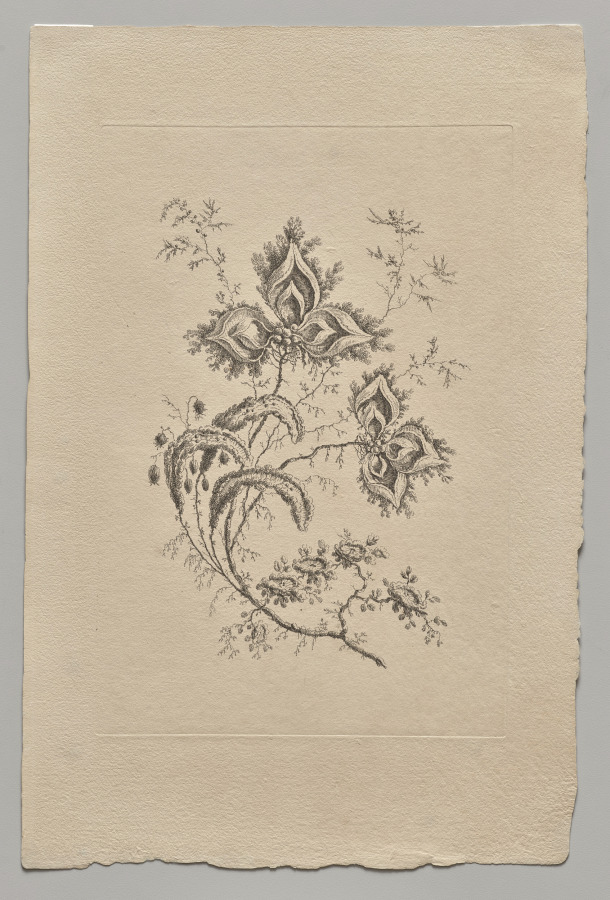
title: Persian Flowers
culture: France, 18th century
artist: Jean Baptiste Pillement (French, 1728–1808)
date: 1755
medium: etching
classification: Print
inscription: Watermark, undeciphered letters/word(s) along left edge.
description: Jean Baptiste Pillement was one of the most influential designers of the Rococo period, known for his varied and prolific chinoiseries (European variants of Chinese and Japanese motifs). His designs were spread throughout Europe primarily via their translation into prints. This print is one of a set of six etched by Pillement himself. Each depicts a so-called “Persian” flower, largely fantasies, presenting strange, alienlike floral forms that could be adapted to various uses from textiles to wall decorations.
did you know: The artist Jean Baptiste Pillement was employed by Marie Antoinette to create decorations for her legendary retreat, the Petit Trianon, at Versailles.